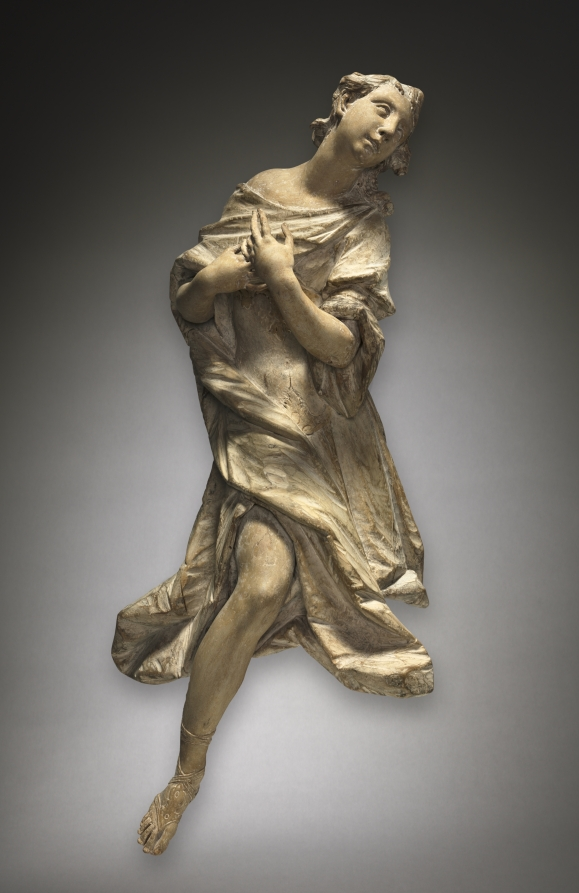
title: Kneeling Angel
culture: Germany, Munich, 18th century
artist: Ignaz Günther (German, 1725–1775)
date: c. 1760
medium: gessoed and painted wood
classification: Sculpture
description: This angel, and another now in the Philadelphia Museum of Art, were probably originally placed on either side of a tabernacle—a structure designed to hold the consecrated bread and wine of the Eucharist—on an altar in a Christian church or private chapel. The angels would originally have had wings, and the now plain surface of the sculpture would have been painted or gilded. Ignaz Günther was among the most sought-after carvers of religious sculpture in southern Germany. His virtuoso skill is particularly evident here in the angel’s pious expression and elegantly formed hands and feet.